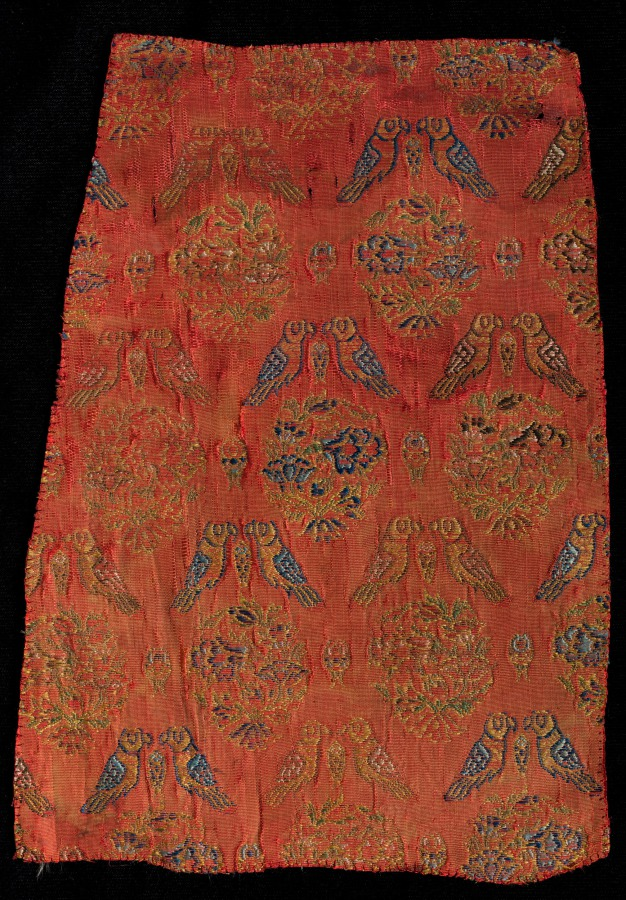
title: Fragment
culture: Iran, 18th century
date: 1700s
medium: brocade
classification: Textile